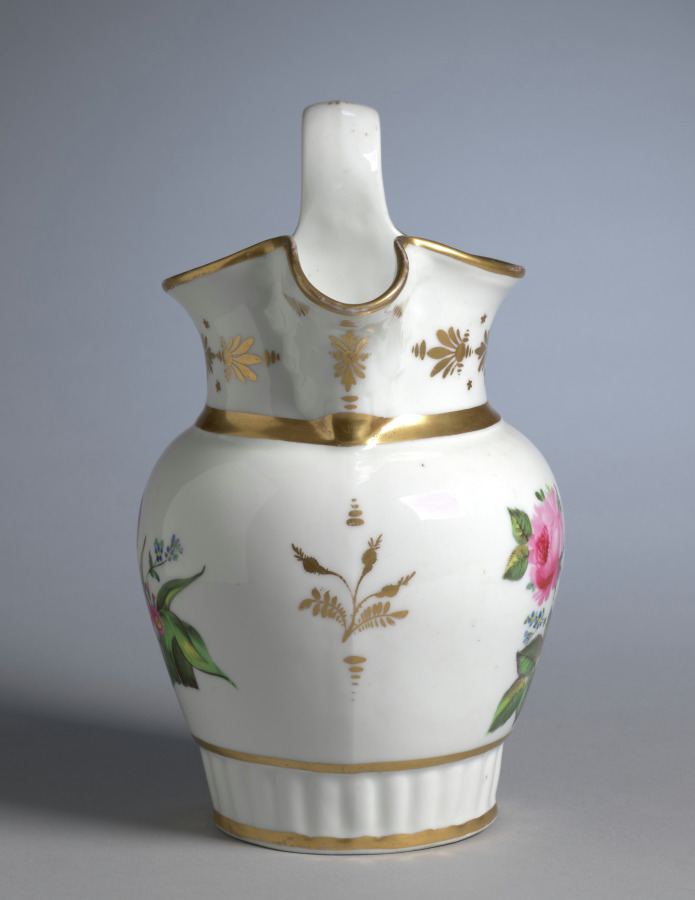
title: Pitcher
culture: America, Pennsylvania, Philadelphia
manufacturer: Tucker Factory (American)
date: c. 1830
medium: porcelain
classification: Ceramic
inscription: bears tape on bottom inscribed: Josephine Wood [Price?] / this belongs to [---] / Wood.